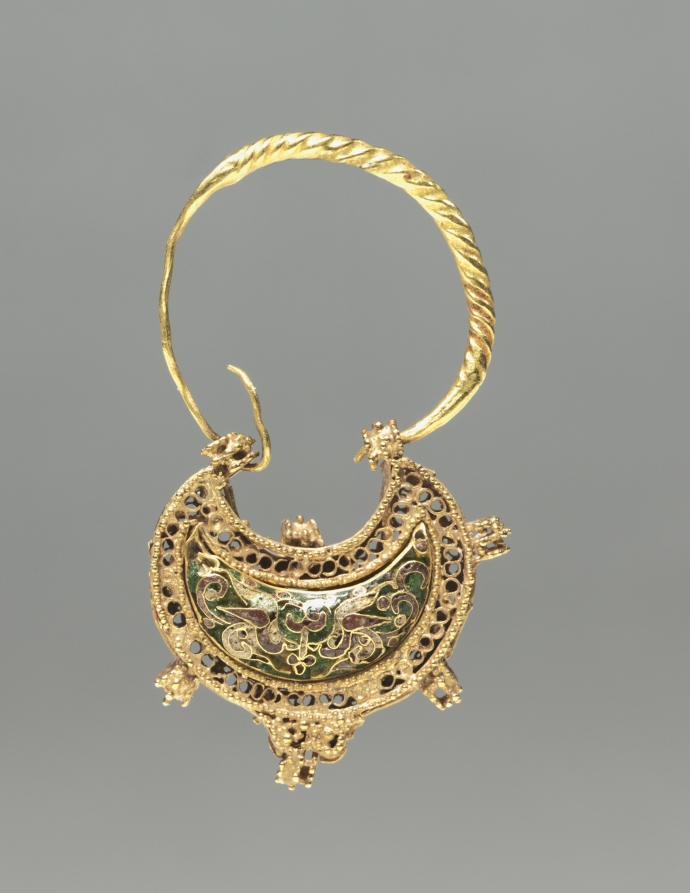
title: Crescent-Shaped Earring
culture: Byzantium, Constantinople?, Byzantine period, 11th century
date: 1000–1100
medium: gold filigree with cloisonné enamel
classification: Jewelry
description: The Byzantine lady who wore this earring may also have woven similar ornaments into her hair. Those who could afford it adorned not only their body but also their clothing with glittering jewels and shimmering gold.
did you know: Small gold cells were created to hold enamel paste of different colors; when fired, they harden and appear jewel-like.